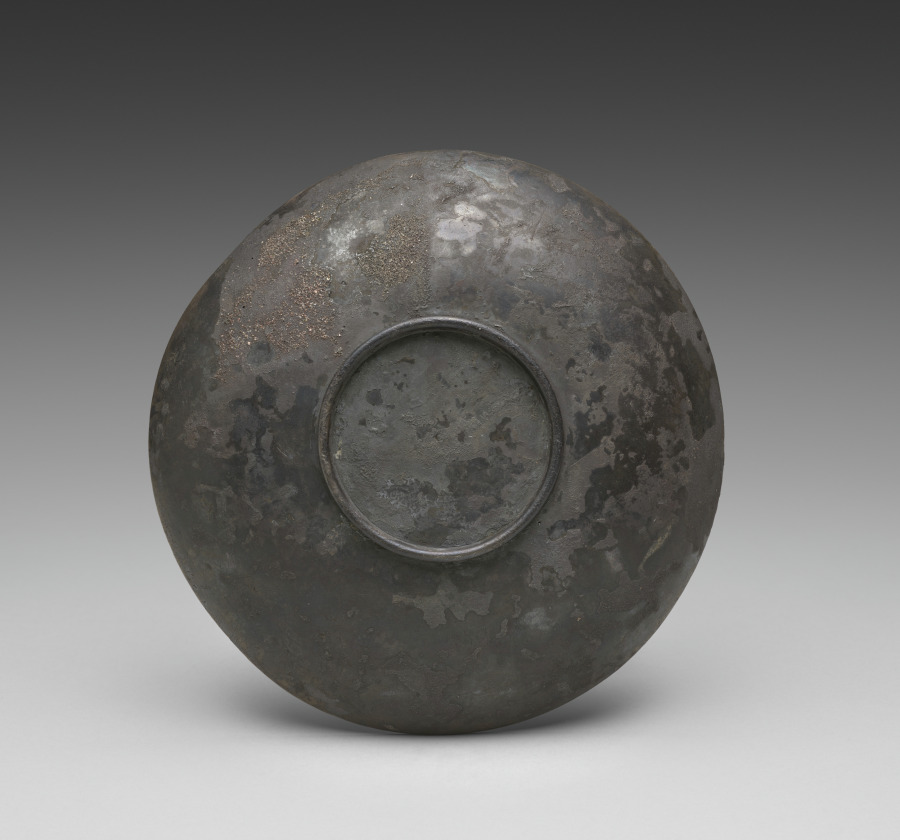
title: Bowl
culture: Roman, Imperial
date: c. 100–300 CE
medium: silver: cast and carved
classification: Metalwork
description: This large cast silver bowl features wavy fluting (sometimes called strigilation) across much of the interior, terminating in a sort of scalloped edge and finely beaded border beneath the rim. Within the central medallion are a miniature oblong shell-like object and the punched inscription VERISS (perhaps a name), both slightly off-center. The combination of wavy fluting, scalloped edges, and a shell-like object may allude to the sea, or to the liquid contents this bowl may once have contained.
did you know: This solid silver bowl weighs nearly one kilogram, more than two pounds.